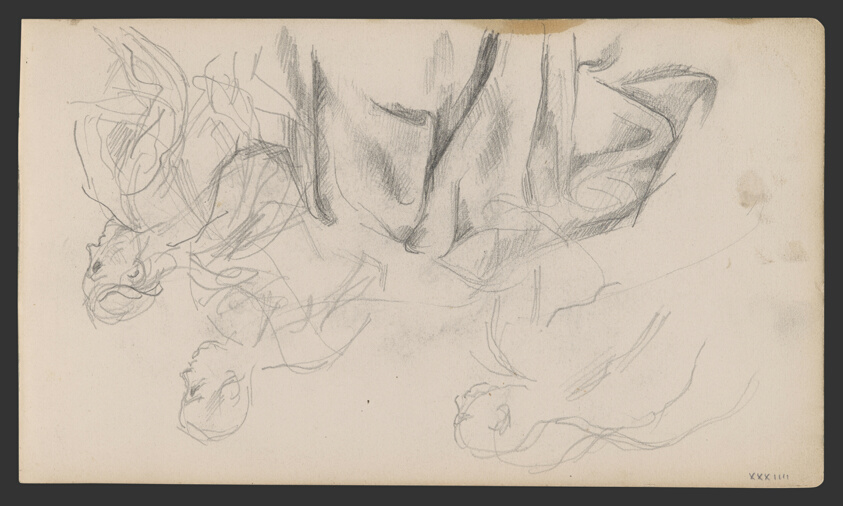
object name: Drawing and Watercolor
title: Sketchbook No. 2 (L'Estaque)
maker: Paul Cézanne; French, 1839-1906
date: 1875–86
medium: Graphite and pen and ink drawings on paper, bound into a book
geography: France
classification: sketchbook; graphite; prints and drawing; paper